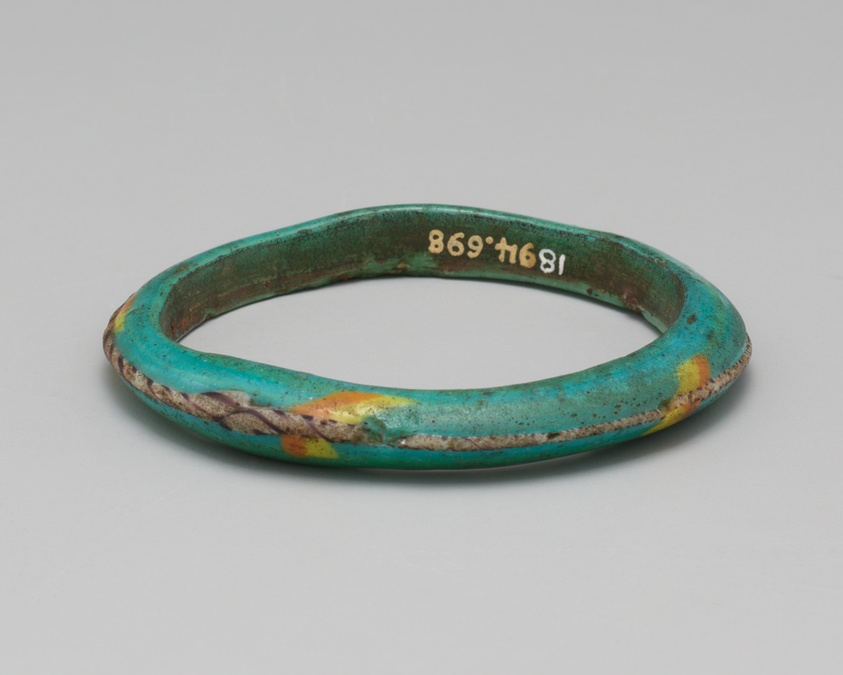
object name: Costume and Accessories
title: Bracelet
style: Islamic (culture or style)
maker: Islamic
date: 14th-15th century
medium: Glass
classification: glass; jewelry; ancient art; costume